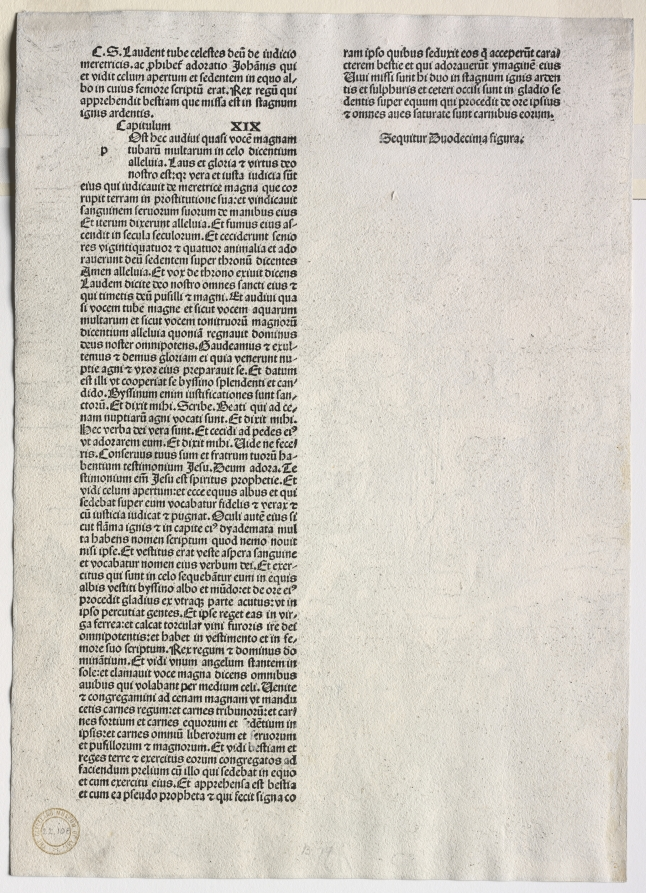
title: Revelation of St. John: Beast with Ram's Horns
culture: Germany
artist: Albrecht Dürer (German, 1471–1528)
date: 1511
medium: woodcut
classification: Print